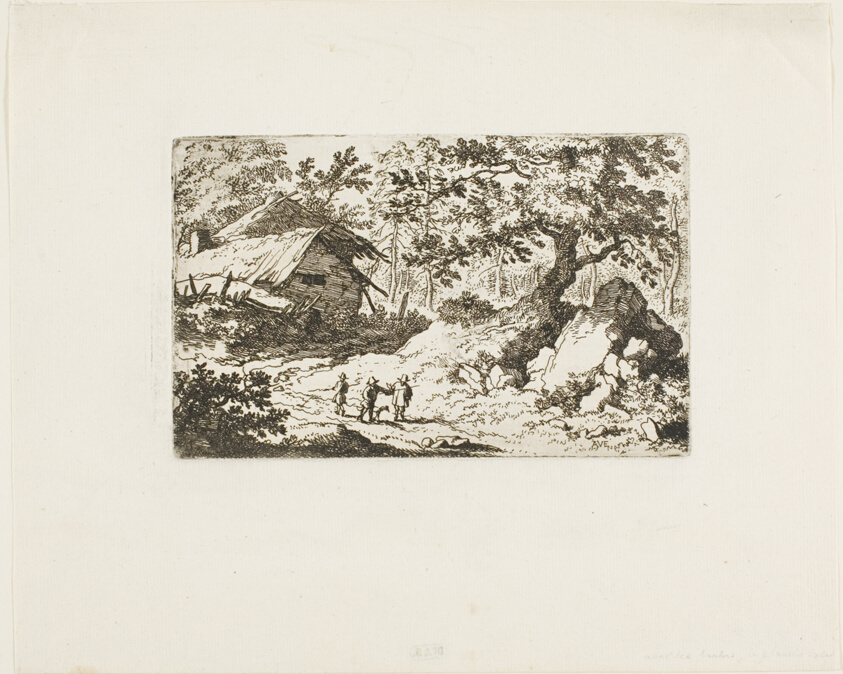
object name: Print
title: The Ruined Hut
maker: Allart van Everdingen; Dutch, 1621-1675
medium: Etching on ivory laid paper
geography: Holland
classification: etching; print; prints and drawing